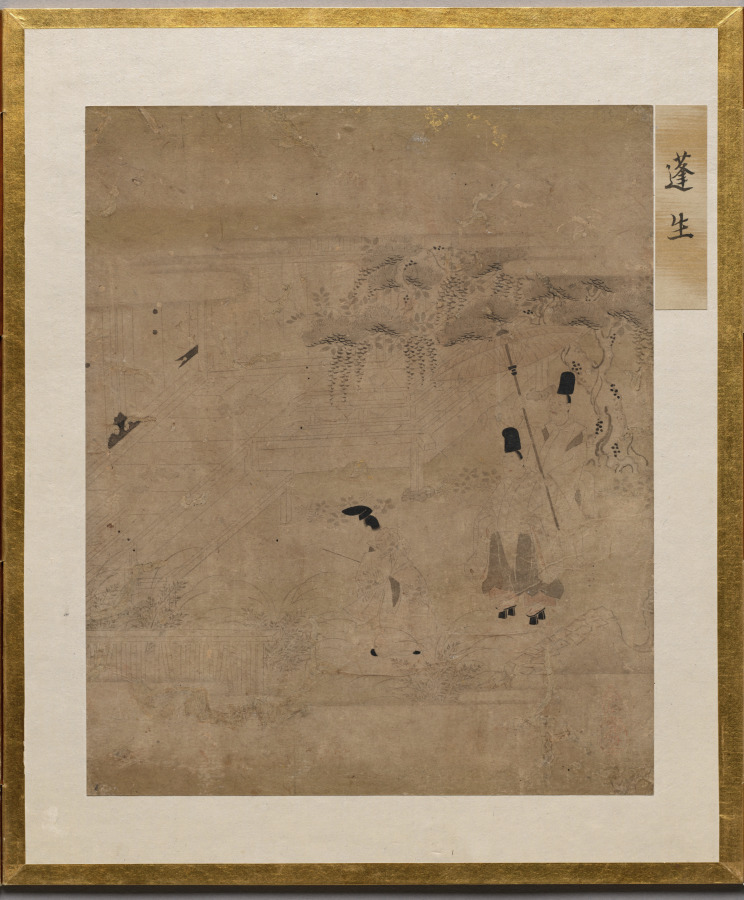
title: Wormwood Patch from Album of Illustrations for the Tale of Genji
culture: Japan, Edo period (1615–1868)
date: 1600s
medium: painting in an accordion-style album; ink, light color, and gold on paper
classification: Bound Volume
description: This album contains illustrations for the classic literary work the Tale of Genji, authored in the 1000s by Murasaki Shikibu, an aristocrat of the Heian period (794–1185) court. The scenes are painted in the “white drawing” (hakubyō) mode, in which a fine ink line is used to depict figures and spaces with great subtlety, punctuated only occasionally by traces of red pigment for a character’s lips, a detail of a garment, or a decorative element. These two scenes illustrate episodes from the chapters “Thin Veil of Cloud” (Usugumo) and “Barrier Gate” (Sekiya).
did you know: The illustrations are identified by chapter title in cartouches to the upper right of the paintings.